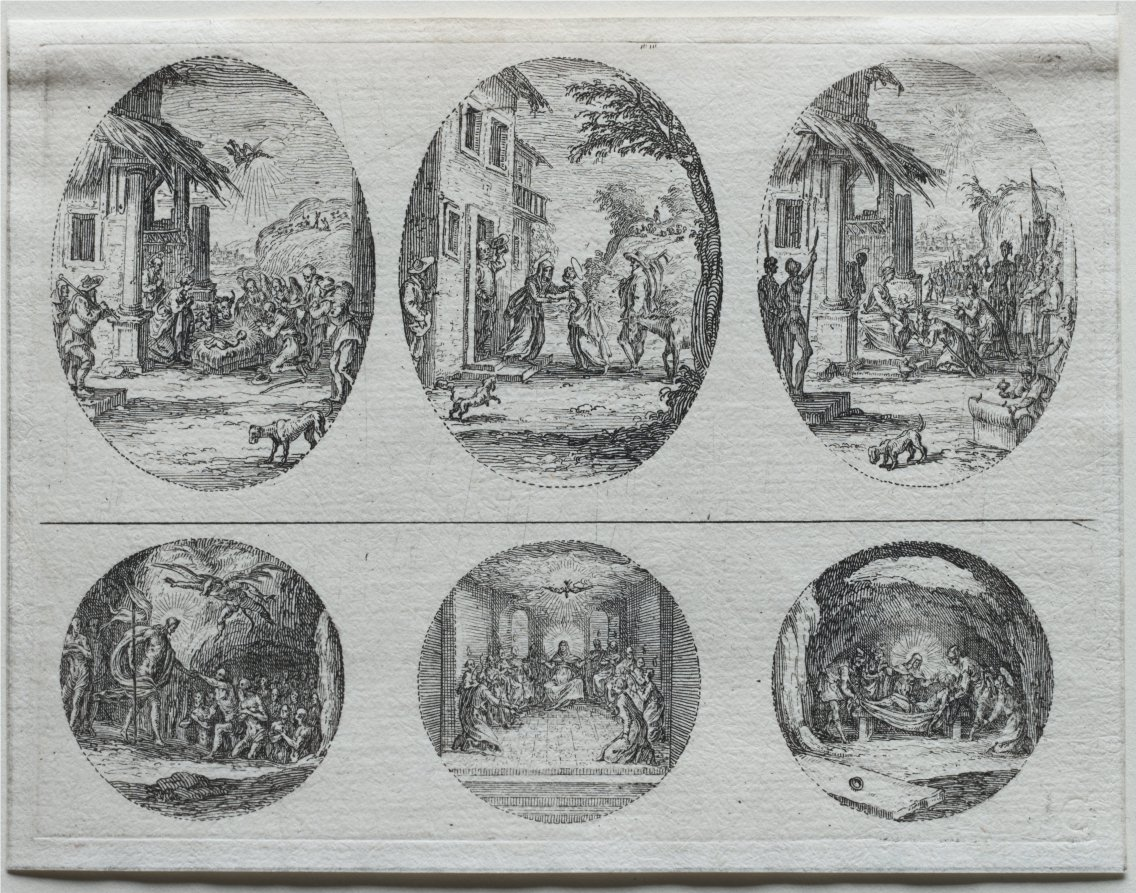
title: The Mysteries of the Passion: The Descent into Limbo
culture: France, 17th century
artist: Jacques Callot (French, 1592–1635)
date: 1631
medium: etching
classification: Print